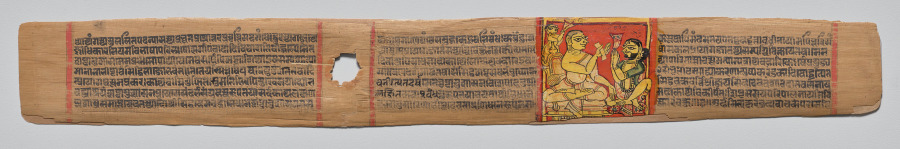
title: King Kumarapala Pays Reverence to Hemachandra: Folio 2 (recto), from a Great Poem about Twos (Dvyashraya Mahakavya) of Hemachandra with Commentary by Abhayatilaka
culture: Western India, Gujarat, possibly Patan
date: 1428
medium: Gum tempera and ink on palm leaf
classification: Painting